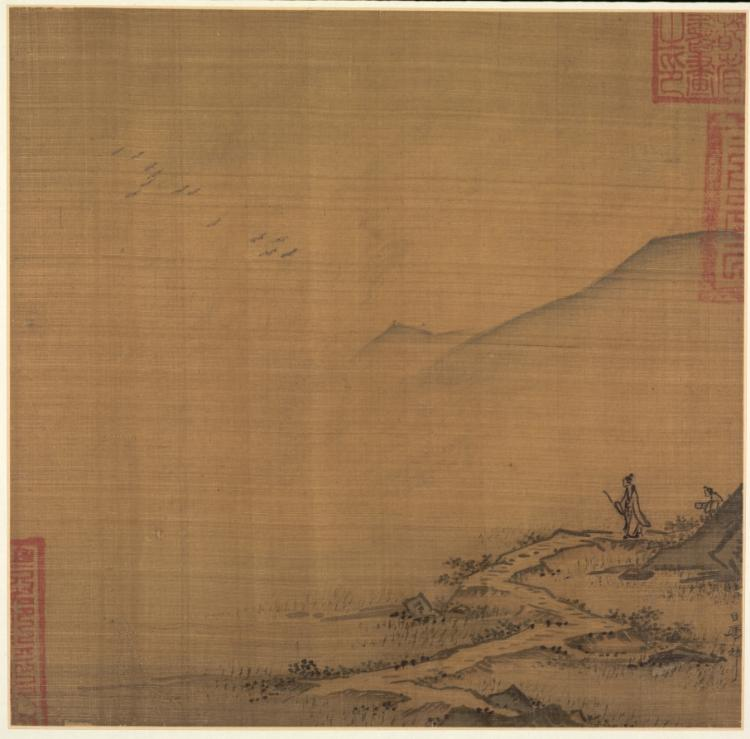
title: Landscape with Flying Geese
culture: China, Southern Song dynasty (1127-1279)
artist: Ma Lin (Chinese, c. 1185–after 1260)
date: mid-1200s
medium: Album leaf; ink and slight color on silk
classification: Painting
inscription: 臣馬麟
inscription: 3 half-seals: 1 official seal of Yuan Dynasty; 1 of Ming imperial collection (used 1372-84); 1 official seal of Ming Dynasty.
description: This minimalist landscape places most of the representational elements in the lower right foreground. A lone gentleman strolls along a zigzagging path by the water. With the gentleman’s staff acting as a visual cue, the viewer’s gaze is directed to geese flying over distant mountains. The scene of a marshland, with its wet and soft ground dotted with vegetation, suggests springtime in Jiangnan. Combined with the flying geese, the album evokes the poetic lines: By spring fields, geese are about to return, Under chilly waters, fish are submerging. 春郊欲回雁, 寒水正沉鱼